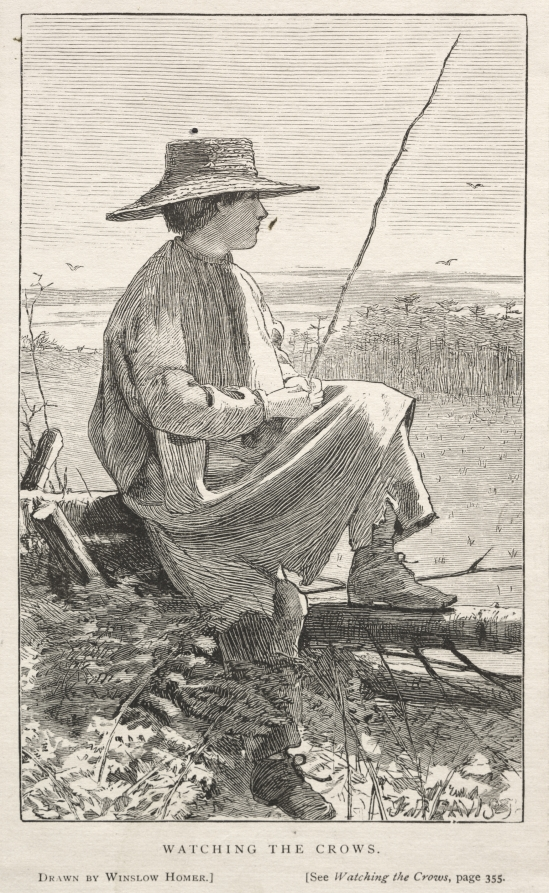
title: Watching the Crows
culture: America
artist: Winslow Homer (American, 1836–1910)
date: 1868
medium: wood engraving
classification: Print